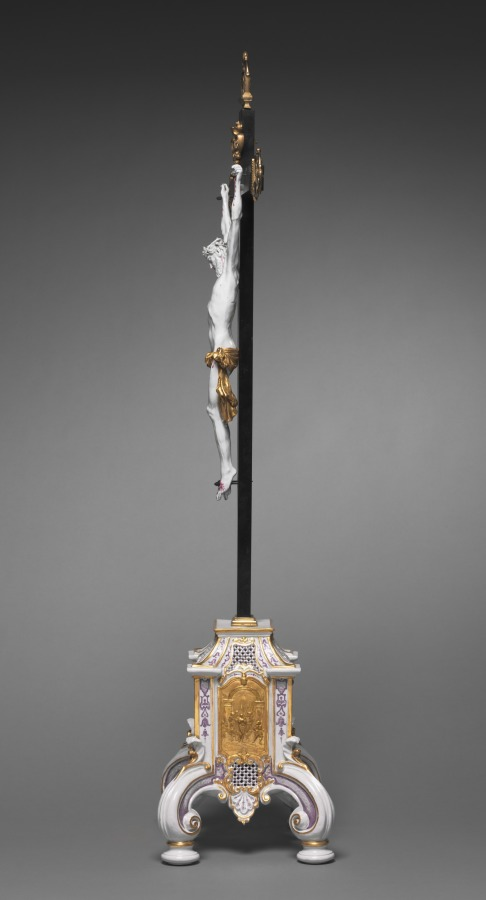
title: The Crucifixion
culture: Austria, Vienna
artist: Du Paquier Porcelain Manufactory (Austrian, active 1719–1864)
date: c. 1730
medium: porcelain, ebonized wood cross with gilt bronze mounts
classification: Ceramic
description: The second oldest European porcelain factory after that at Meissen (in Germany) was set up in Vienna in 1716. During its early years, the Vienna factory was privately owned by a court official, Claudius Innocentius Du Paquier, and its early wares—made before 1744—carry his name. They are characterized by energetic shapes, strong colors, and the use of gold for surface decoration. This is the only Du Paquier crucifix known today. The figure of Christ closely resembles the work of Vienna's most famous sculptor, Georg Raphael Donner (1693–1741), and was probably created by one of his followers especially to be used on this crucifix. The anatomical accuracy and precise detail of the figure, along with the abundance of gold decoration, indicate that the piece was probably a special commission intended for a distinguished patron, possibly a member of the Hungarian Esterházy family.